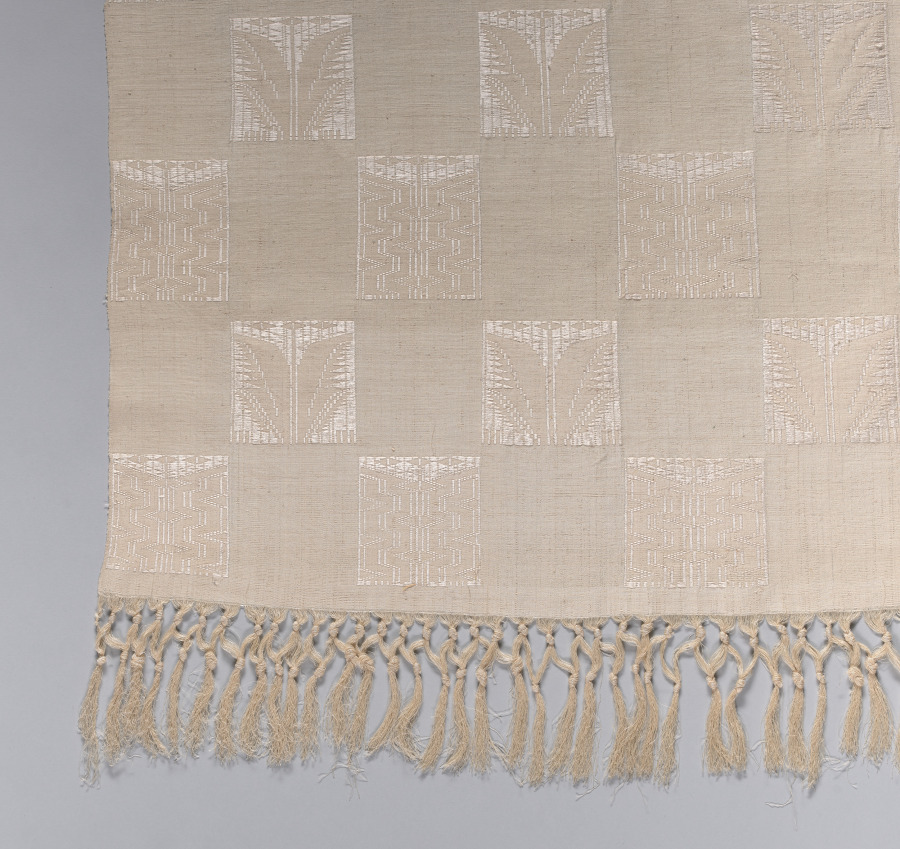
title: One of a pair of shawls (Lamba Landy Fotsy)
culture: Africa, East Africa, Madagascar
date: 1900s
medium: Silk (Bombyx mori and Borocera cajani)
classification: Textile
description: A lamba is an untailored textile worn by all ages, classes, and genders across much of Madagascar. This is an example of a woman’s garment made after Queen Ranavalona II made Christianity the state religion of the Merina Kingdom. Soon after, all-white lamba became popular for both Sunday church and daily wear. Fotsy is white in the Malagasy language. Indicating its owner’s worldliness, the white-on-white patterns alluded to fashionable imported textiles with damask patterns.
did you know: Invented in the mid-1800s, shawls like this were popular until about 2000.